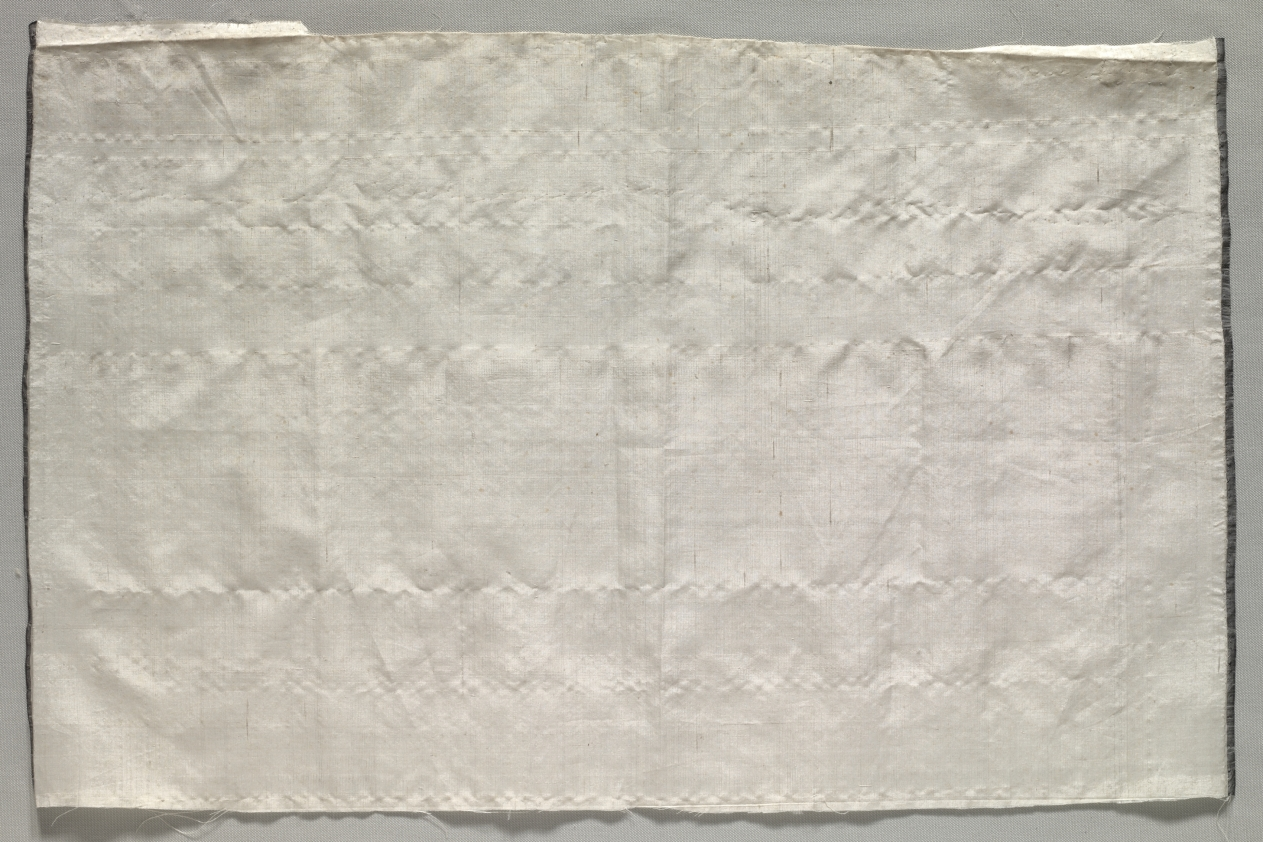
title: Fragment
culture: Iran, 17th century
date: 1600s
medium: taffeta; silk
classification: Textile